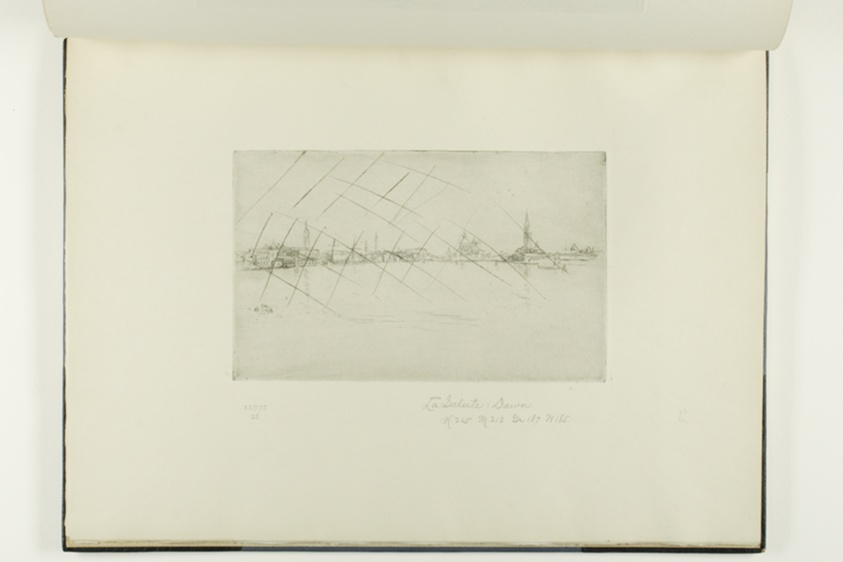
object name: Print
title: La Salute: Dawn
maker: James McNeill Whistler (American, 1834-1903)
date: 1879/80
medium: Etching and drypoint with foul biting, with drypoint cancellation, in black ink on ivory laid paper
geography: United States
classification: etching; prints and drawing; print; drypoint; foul biting; book; paper